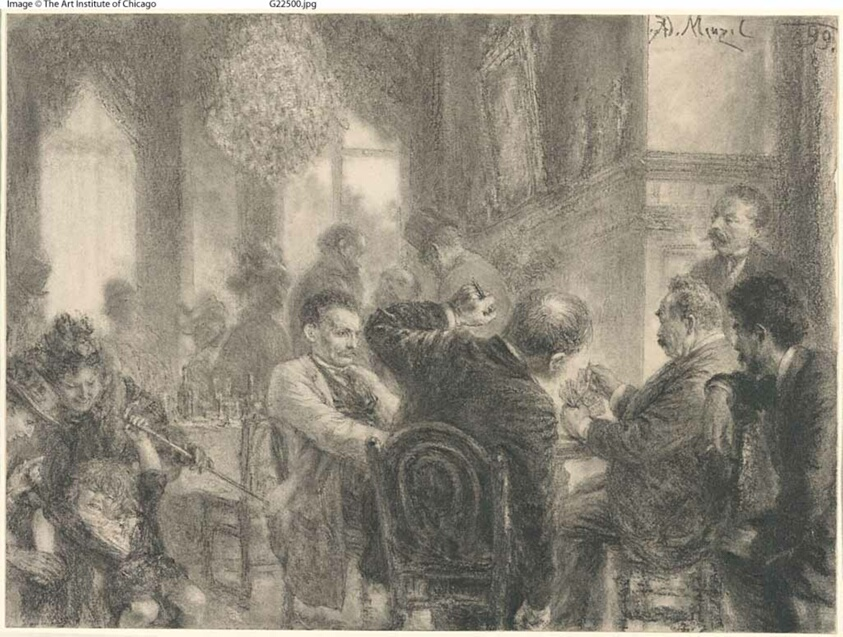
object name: Drawing and Watercolor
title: The Card Game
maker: Adolph Menzel; German, 1815–1905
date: 1899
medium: Graphite and fabricated black chalk, with stumping, erasing, and scraping, with touches of brush and black ink, on cream wove paper, edge mounted on ivory wove card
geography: Germany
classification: prints and drawing; chalk; graphite; drawings (visual works)